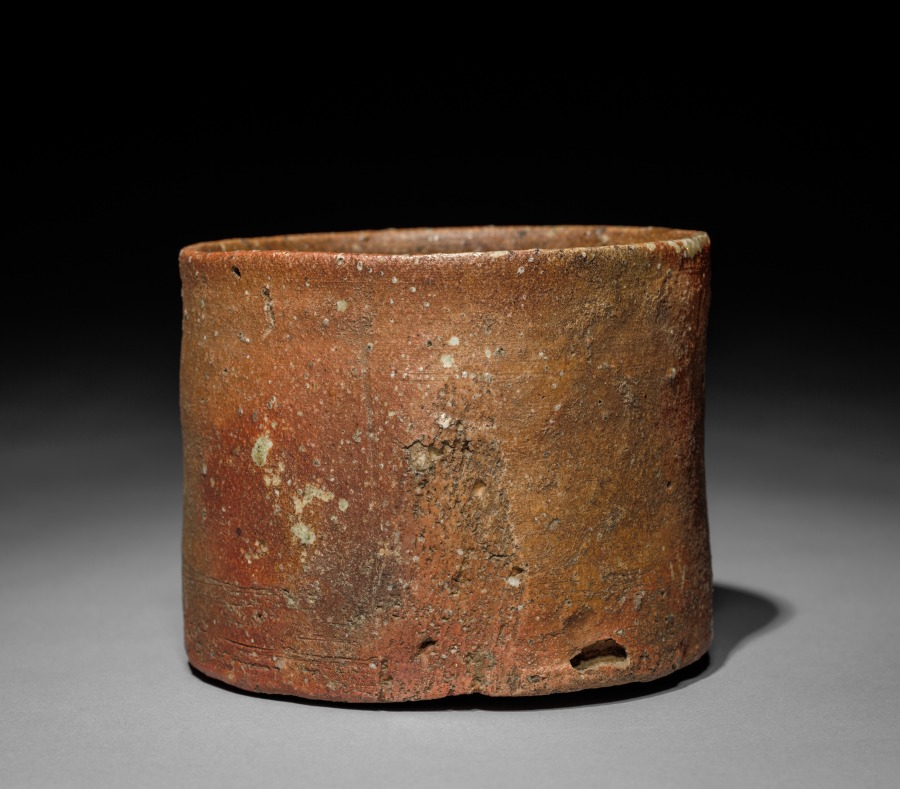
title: Tea Bowl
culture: Japan, Edo period (1615–1868)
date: 1600s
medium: stoneware with natural ash glaze (Shigaraki ware)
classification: Ceramic